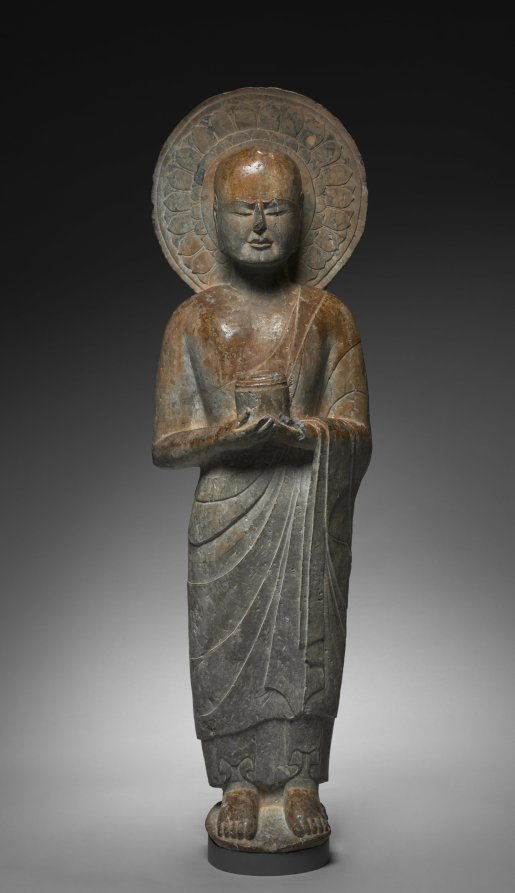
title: Standing Disciple Mahakasyapa Holding a Cylindrical Reliquary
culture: China, Hebei province, Southern Xiangtangshan caves, Northern Qi dynasty (550-577)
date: c. 550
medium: limestone with traces of pigment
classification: Sculpture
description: Mahakasyapa, the disciple of Shakyamuni, is presented with closed eyes in an expression of meditative concentration. He is holding a reliquary for the Buddha’s ashes, which symbolize the Buddha entering final spiritual attainment (nirvana) at death. The artistic simplicity exemplifies the spiritual content of this figure.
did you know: The complex of Buddhist cave temples at Xiangtangshan, “Mountain of Echoing Halls,” is a central achievement of the Northern Qi period.